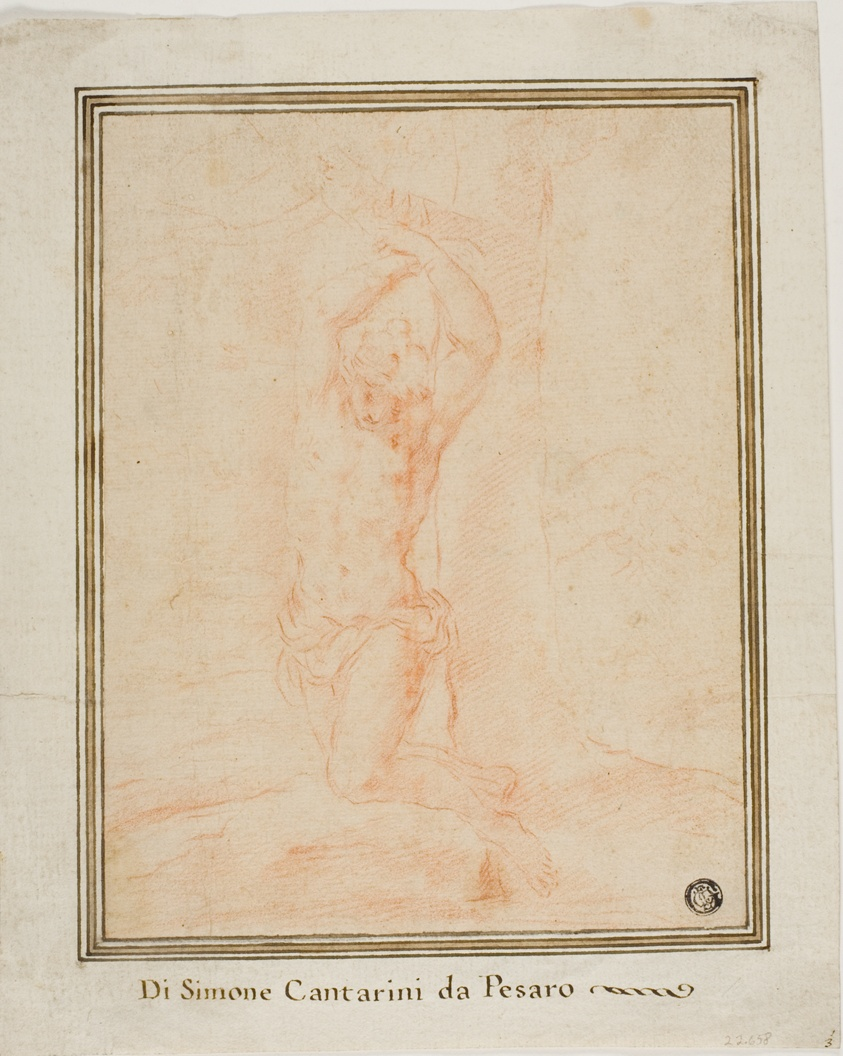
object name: Drawing and Watercolor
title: Saint Sebastian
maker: Attributed to Simone Cantarini; Italian, 1612-1648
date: c. 1639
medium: Red chalk on cream laid paper, laid down on ivory wove paper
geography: Italy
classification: chalk; drawings (visual works); prints and drawing